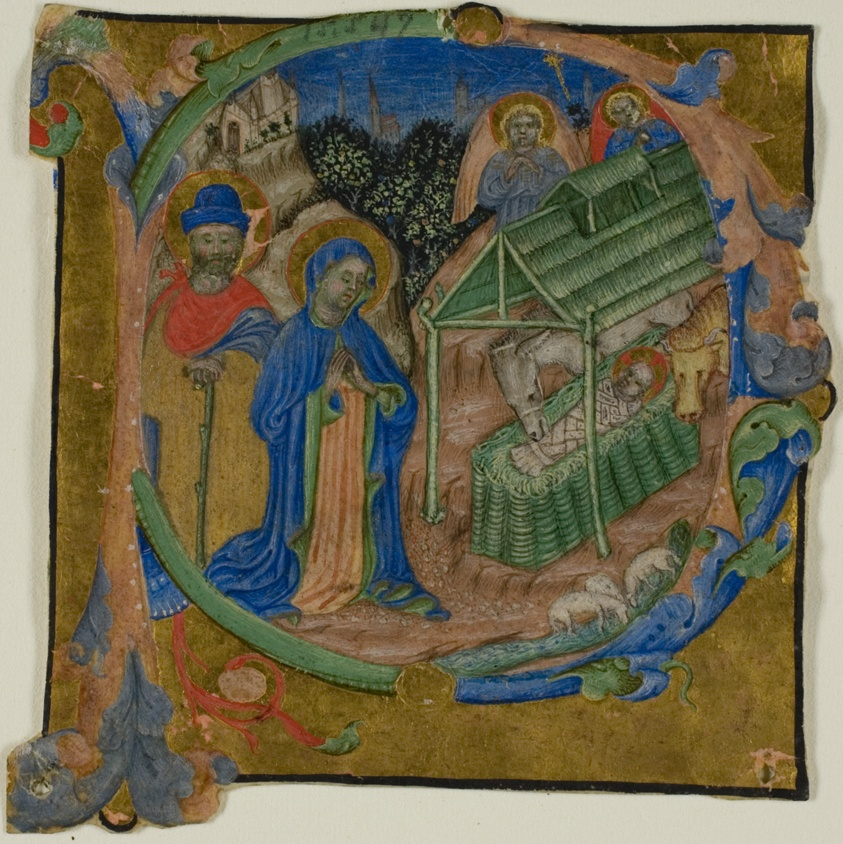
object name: Drawing and Watercolor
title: The Nativity in a Historiated Initial "P" from a Choir Book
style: medieval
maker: Italian (Padua); Master of the Brussels Initials (active Bologna and Paris, 1390-1410)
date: c. 1390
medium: Manuscript cutting in tempera and gold leaf on parchment, with gothica textualis inscriptions in black ink, verso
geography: Italy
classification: tempera; manuscript; drawings (visual works); prints and drawing